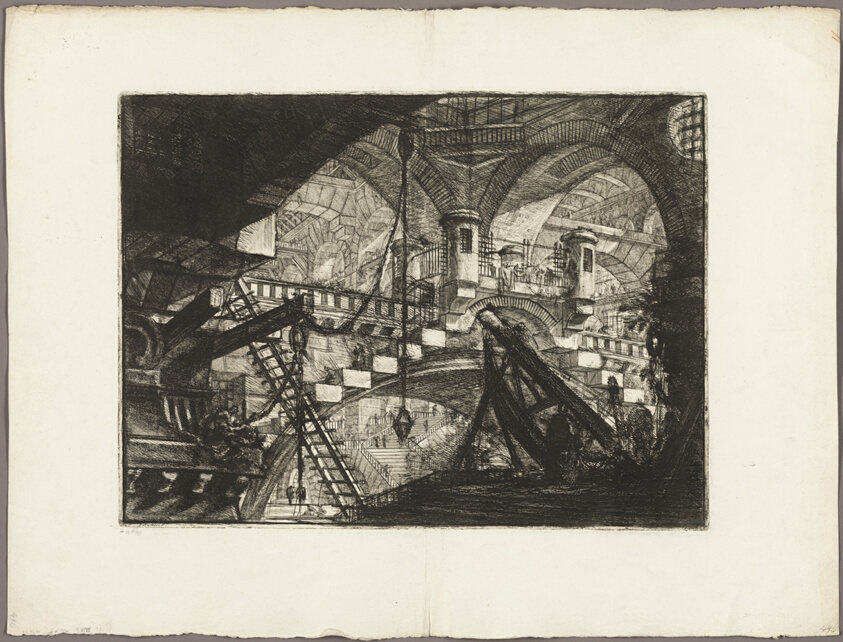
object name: Print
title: The Arch with a Shell Ornament, plate 11 from Imaginary Prisons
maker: Giovanni Battista Piranesi (Italian, 1720-1778)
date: 1761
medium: Etching on heavy ivory laid paper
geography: Italy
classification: etching; print; prints and drawing